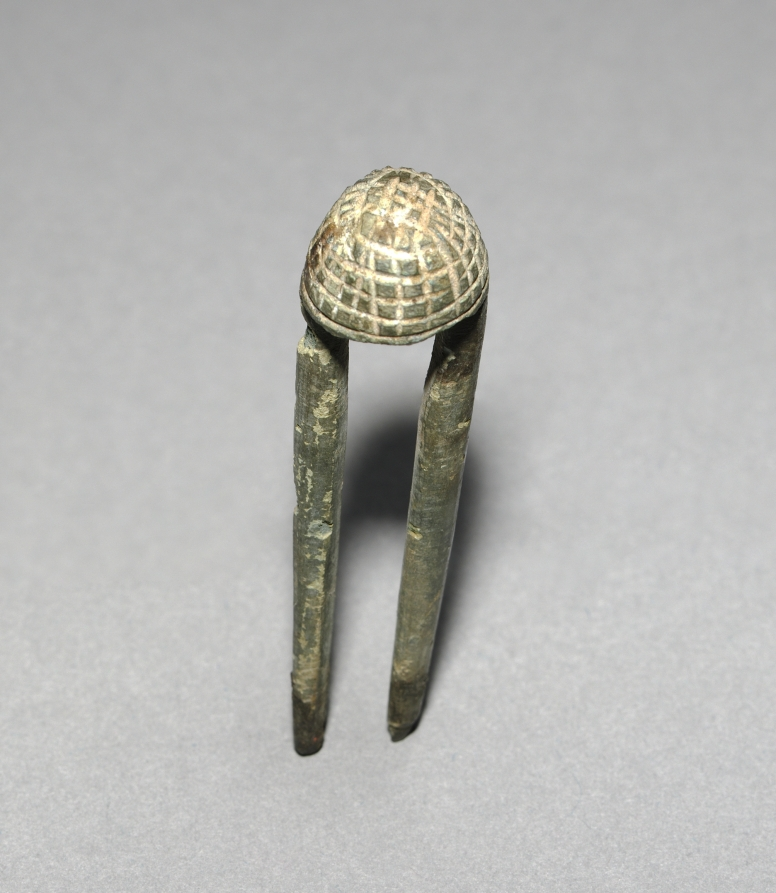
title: Topknot Pin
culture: Korea, Goryeo dynasty (918–1392)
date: 918–1392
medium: bronze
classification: Metalwork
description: Metallurgy advanced remarkably in the Goryeo period (918-1392), explaining why a large quantity of sophisticated metal artifacts were used not only as daily accessories but also as burial goods. Men put their hair in a knot at the top of their heads. To keep their long hair from falling, a bronze pin such as this one was used.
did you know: This bronze hairpin was for a man to fix his topknot.